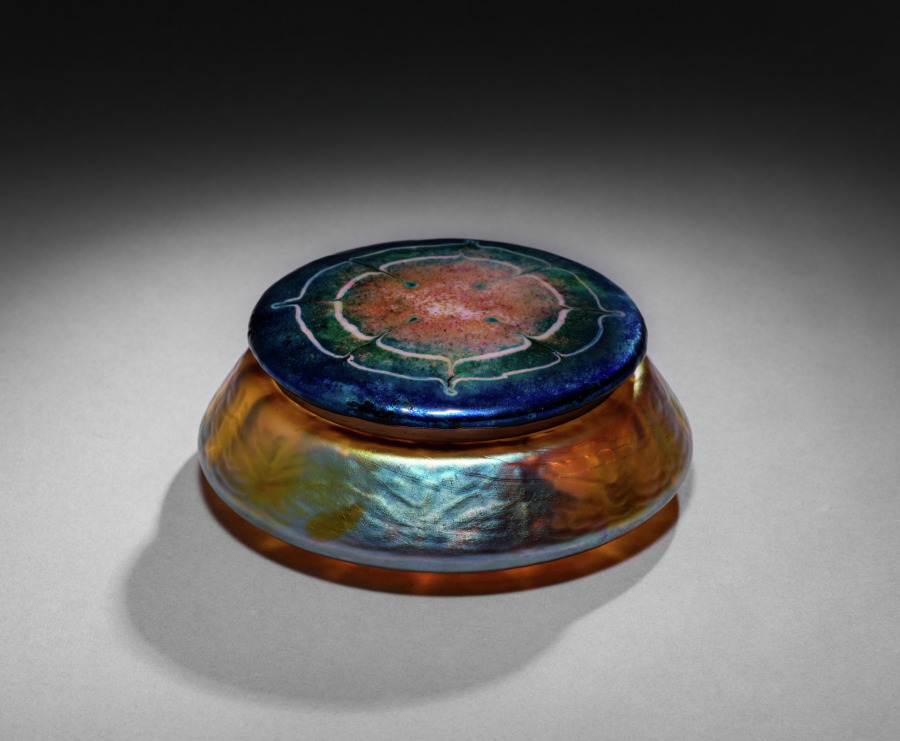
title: Covered Box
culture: America, New York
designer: Louis Comfort Tiffany (American, 1848–1933)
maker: Tiffany Glass & Decorating Company (America, New York, 1892–1902)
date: 1898–1901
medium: Favrile glass, enamel on copper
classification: Glass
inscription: engraved on bottom: 129 Louis C. Tiffany Favrile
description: By 1900 Tiffany had expanded his empire by increasing the firm’s production of “fancy goods,” including inkstands, candlesticks, clocks, small boxes, desk sets, tea screens, and other functional objects. Along with the array of artistic glass designs from his factory in Corona, Queens, works in ceramic, bronze, other metals, and even jewelry abounded. These smaller, more affordable luxury items were designed with as much thought to artistry as the great stained glass windows and lamps through which the firm enjoyed unrivaled success.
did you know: This fanciful dressing table accessory likely contained dusting powder and a feather puff.